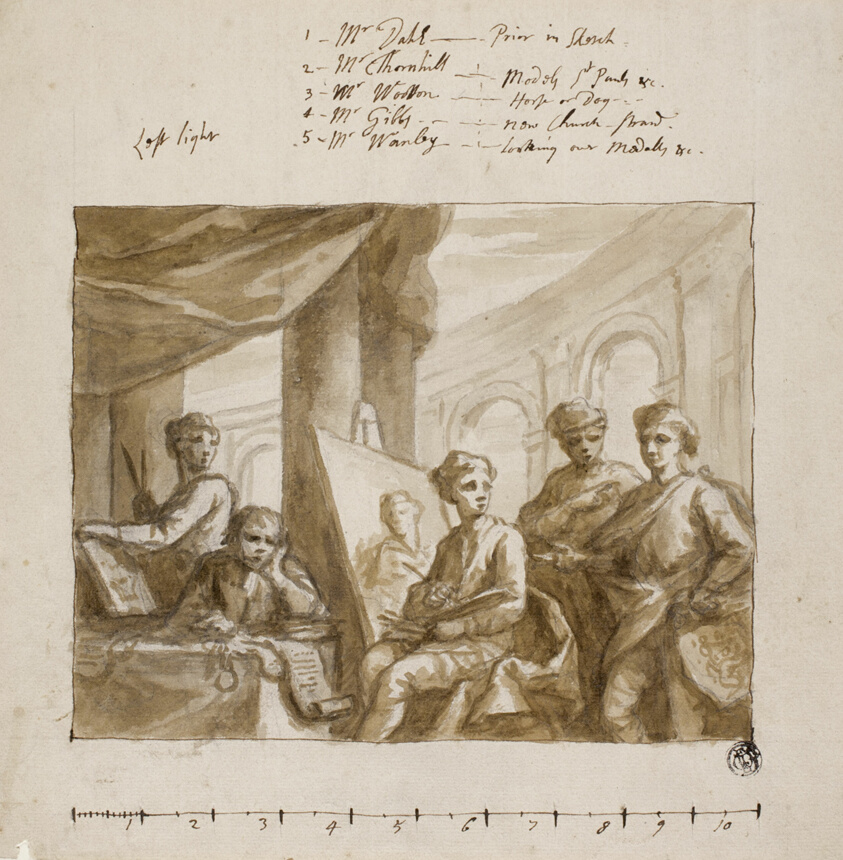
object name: Drawing and Watercolor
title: Company of Painters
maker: Attributed to James Thornhill (English, 1675-1734); or William Hogarth (English, 1697-1764)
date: c. 1719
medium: Brush and brown wash, over graphite, on ivory laid paper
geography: England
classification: ink or chalk wash; drawings (visual works); prints and drawing